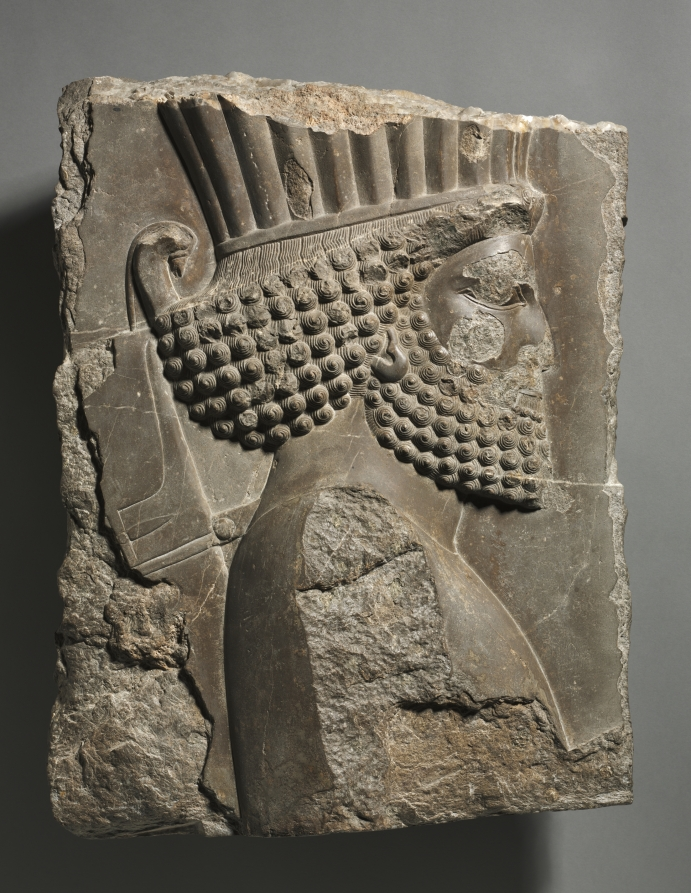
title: Fragment of a Wall Decoration from the Palace of Xerxes: "Guardsman" in Procession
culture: Iran, Achaemenid (550–330 BCE), Persepolis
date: 486–465 BCE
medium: gray limestone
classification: Sculpture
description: In 486 BC, Xerxes succeeded Darius I as king of Persia. His empire, then the world’s largest and most powerful, encompassed an area from Libya to western India and from Ethiopia to Afghanistan. This relief fragment of one of his guards probably comes from the west stairway of his enormous palace at Persepolis. As chronicled by Herodotus, the Greeks defeated Xerxes in a clash of conflicting political systems: democracy and monarchy.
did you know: This relief was probably once brightly painted.